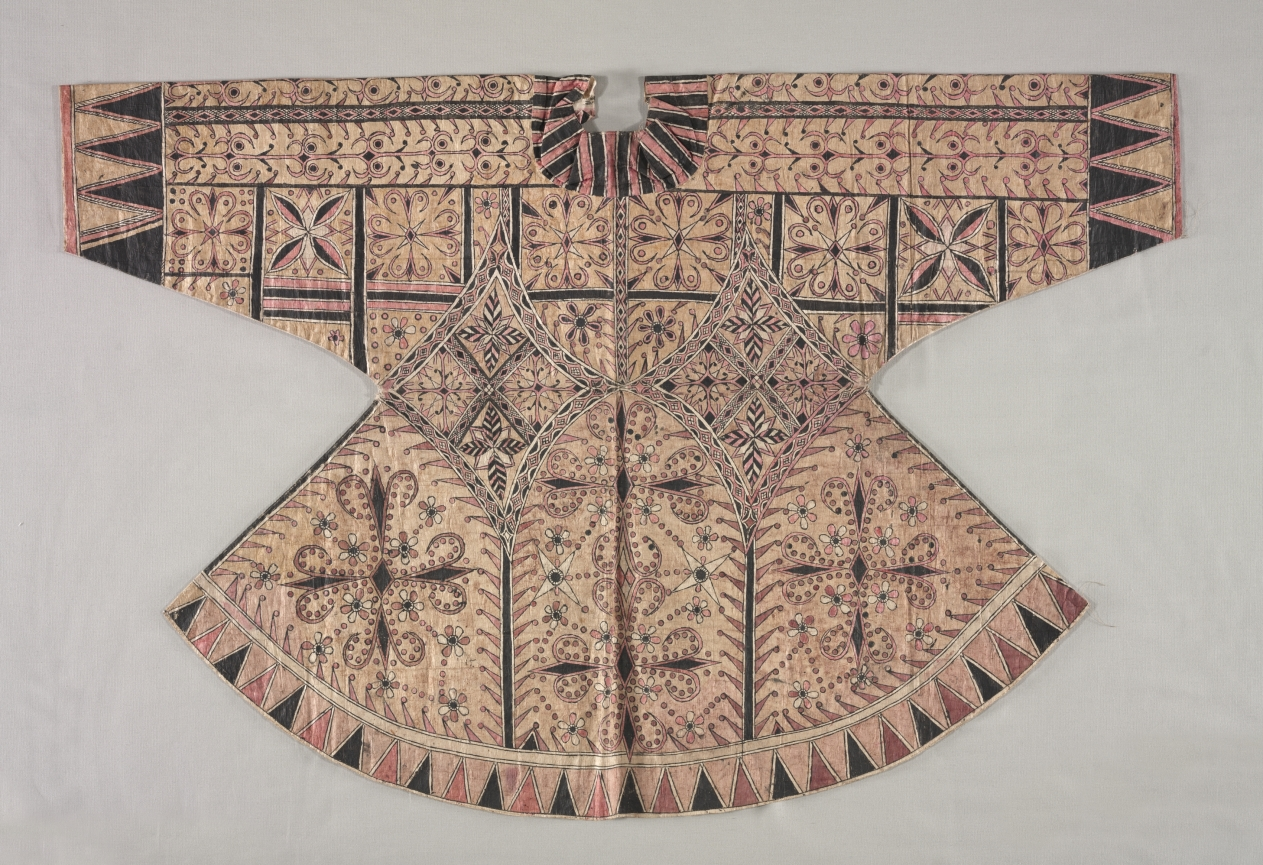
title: Jacket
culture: Indonesia, Sulawesi (Celebes), 19th century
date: 19th century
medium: tapa cloth, printed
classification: Garment